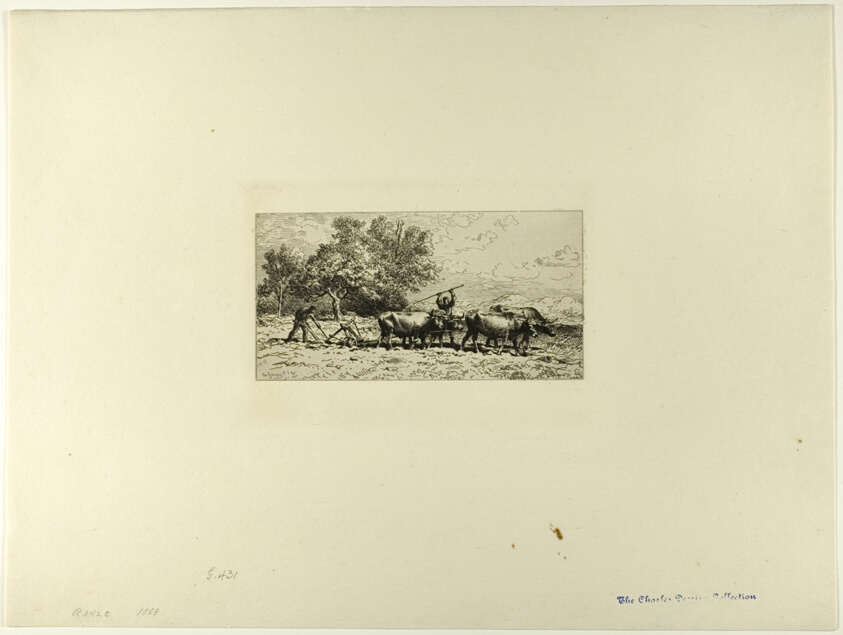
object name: Print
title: Team of Oxen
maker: Charles Émile Jacque (French, 1813-1894)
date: 1868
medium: Etching on ivory laid paper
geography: France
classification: etching; print; prints and drawing